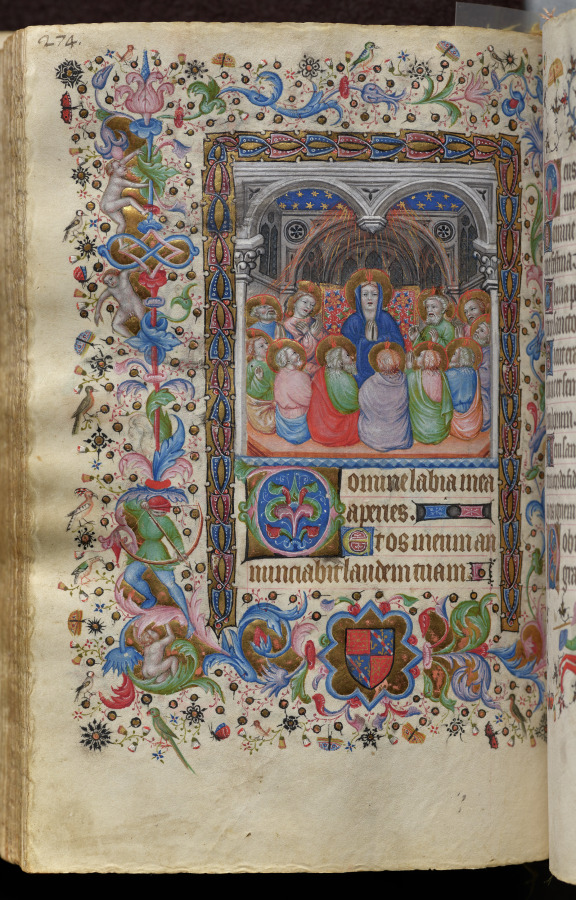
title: Hours of Charles the Noble, King of Navarre (1361-1425): fol. 137v, Pentecost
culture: France, Paris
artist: Master of the Brussels Initials and Associates (French)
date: c. 1405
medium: ink, tempera, and gold on vellum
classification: Bound Volume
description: This precious volume was obviously highly prized by its owner, the French-born King of Navarre, who had his coat of arms painted on no less than twenty folios. Rather than directly commissioning this manuscript from a specific workshop, it seems that Charles the Noble acquired his book of hours -- perhaps ready-made for the luxury market -- while on a trip to Paris in 1404-05. A collaborative effort, six painting styles are evidenced within the pages of this codex, those of two Italians, two Frenchmen, and two Netherlanders. The painter who was responsible for the planning and decoration of the book, and who produced seventeen of the large miniatures, was a Bolognese artist known as the Master of the Brussels Initials. His principal assistant, responsible for most of the borders, was a Florentine who signed his name "Zecho" da Firenze on folio 208 verso.